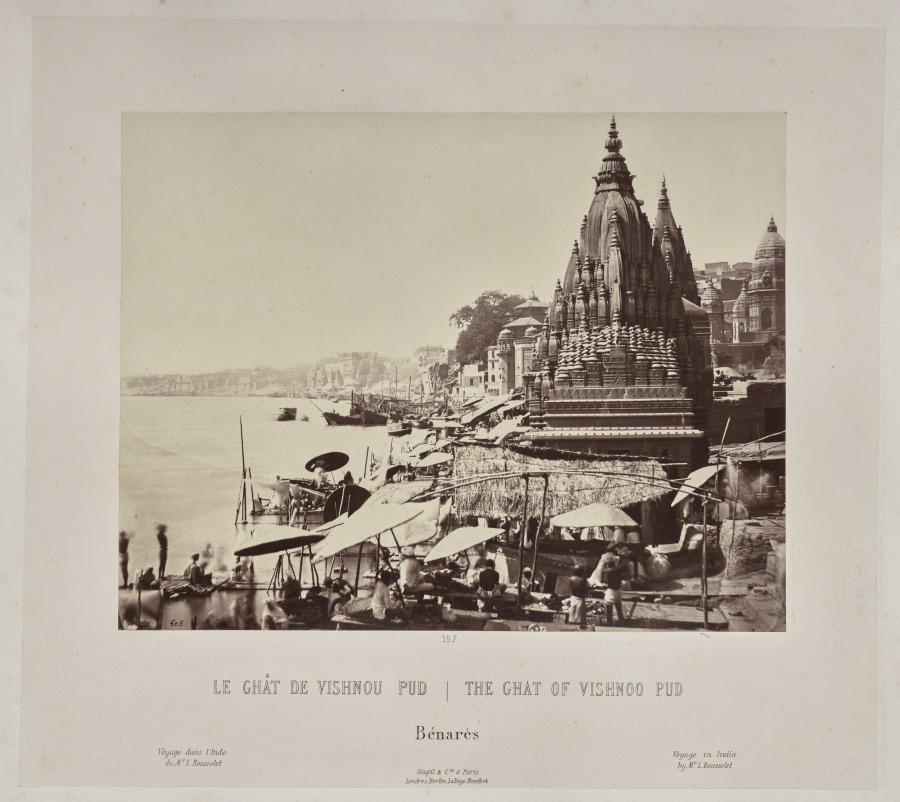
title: The Ghat of Vishnoo Pud, Bénarès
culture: France, 19th century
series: India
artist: Louis-Théophile Marie Rousselet (French, 1845–1929)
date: 1865–68, published 1869–70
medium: Albumen print from glass plate negative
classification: Photograph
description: Concerned that his drawings did not do justice to the splendor of India’s monuments, Rousselet learned photography in India that year, a remarkable accomplishment. He proved to be a talented photographer with a sophisticated sense of composition. The scenes in this volume sweep across sites of Sultanate, Rajput, and Mughal power in northern India, from the sacred Hindu city of Varanasi on the Ganges River to Alwar in Rajasthan. Also included are several scenes of industry and portraits of Indian rulers.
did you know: Louis Rousselet described himself as a “scientific traveler” when he went to India alone at age 18 in 1863 and stayed into 1868.